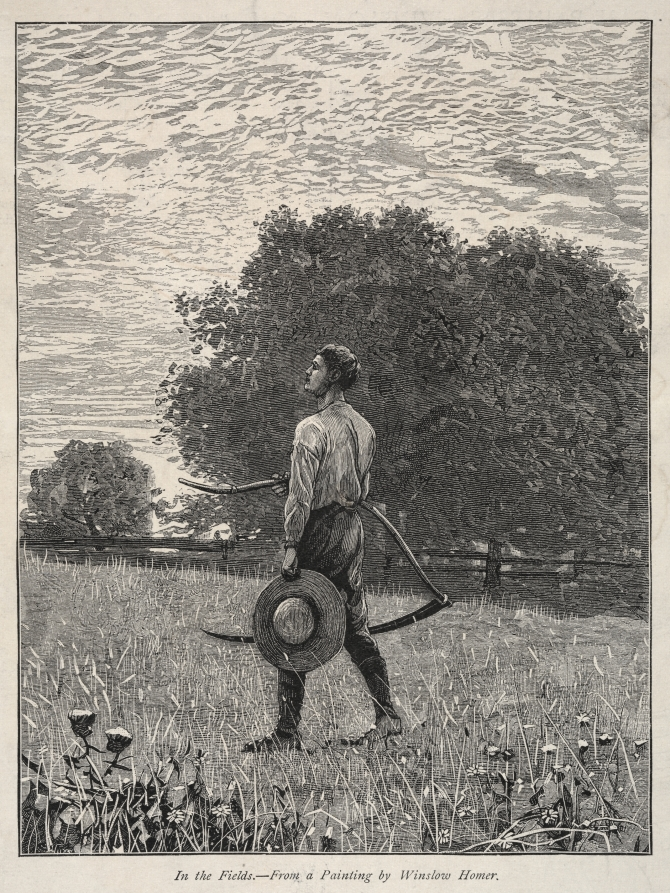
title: In the Fields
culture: America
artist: Winslow Homer (American, 1836–1910)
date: c. 1879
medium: wood engraving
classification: Print